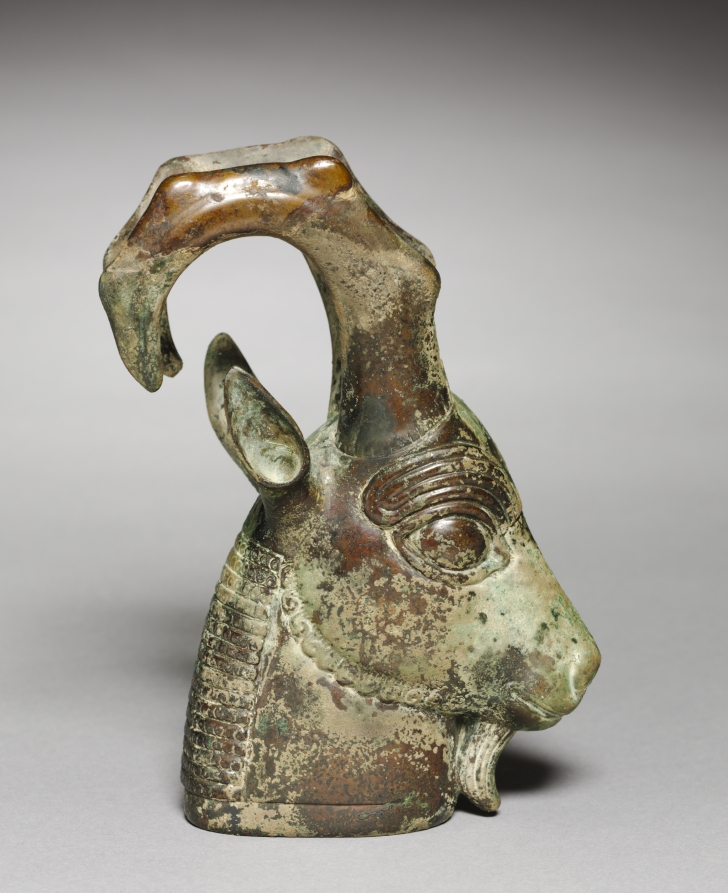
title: Ibex-Head Ornament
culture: Iran, Achaemenid (550–330 BCE)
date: c. 525–450 BCE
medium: bronze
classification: Sculpture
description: This may have decorated an ornate piece of furniture or a huge and heavily embellished bronze cauldron similar to that which the nearby bronze bull head once adorned.